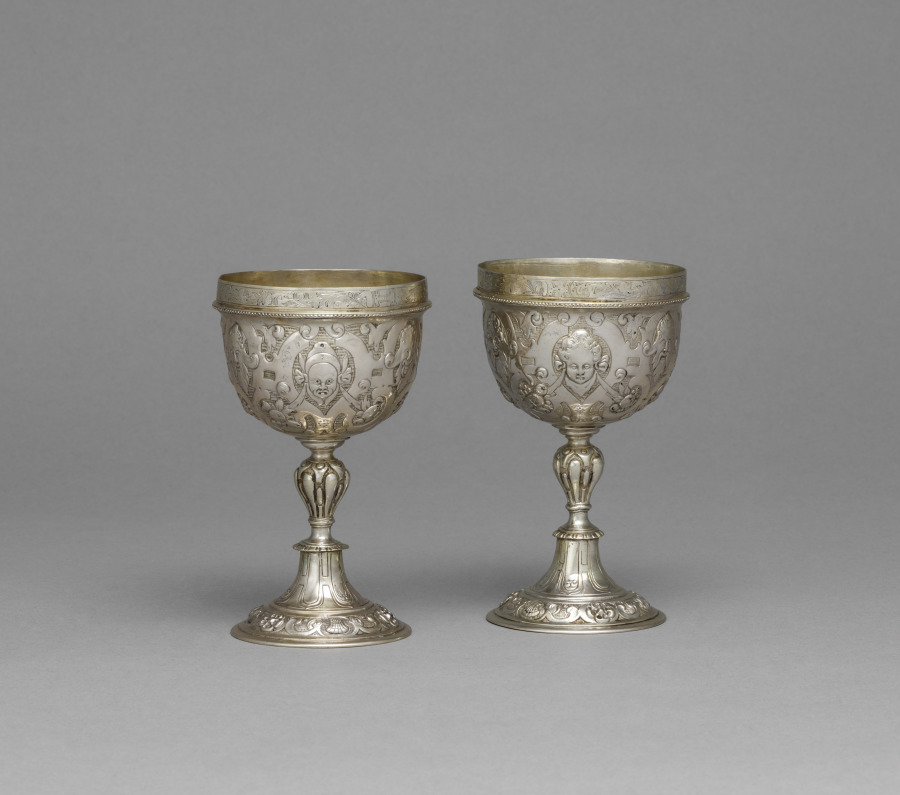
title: Bridal Cup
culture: Germany, Nuremburg(?), 17th century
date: c. 1600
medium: silver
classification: Silver